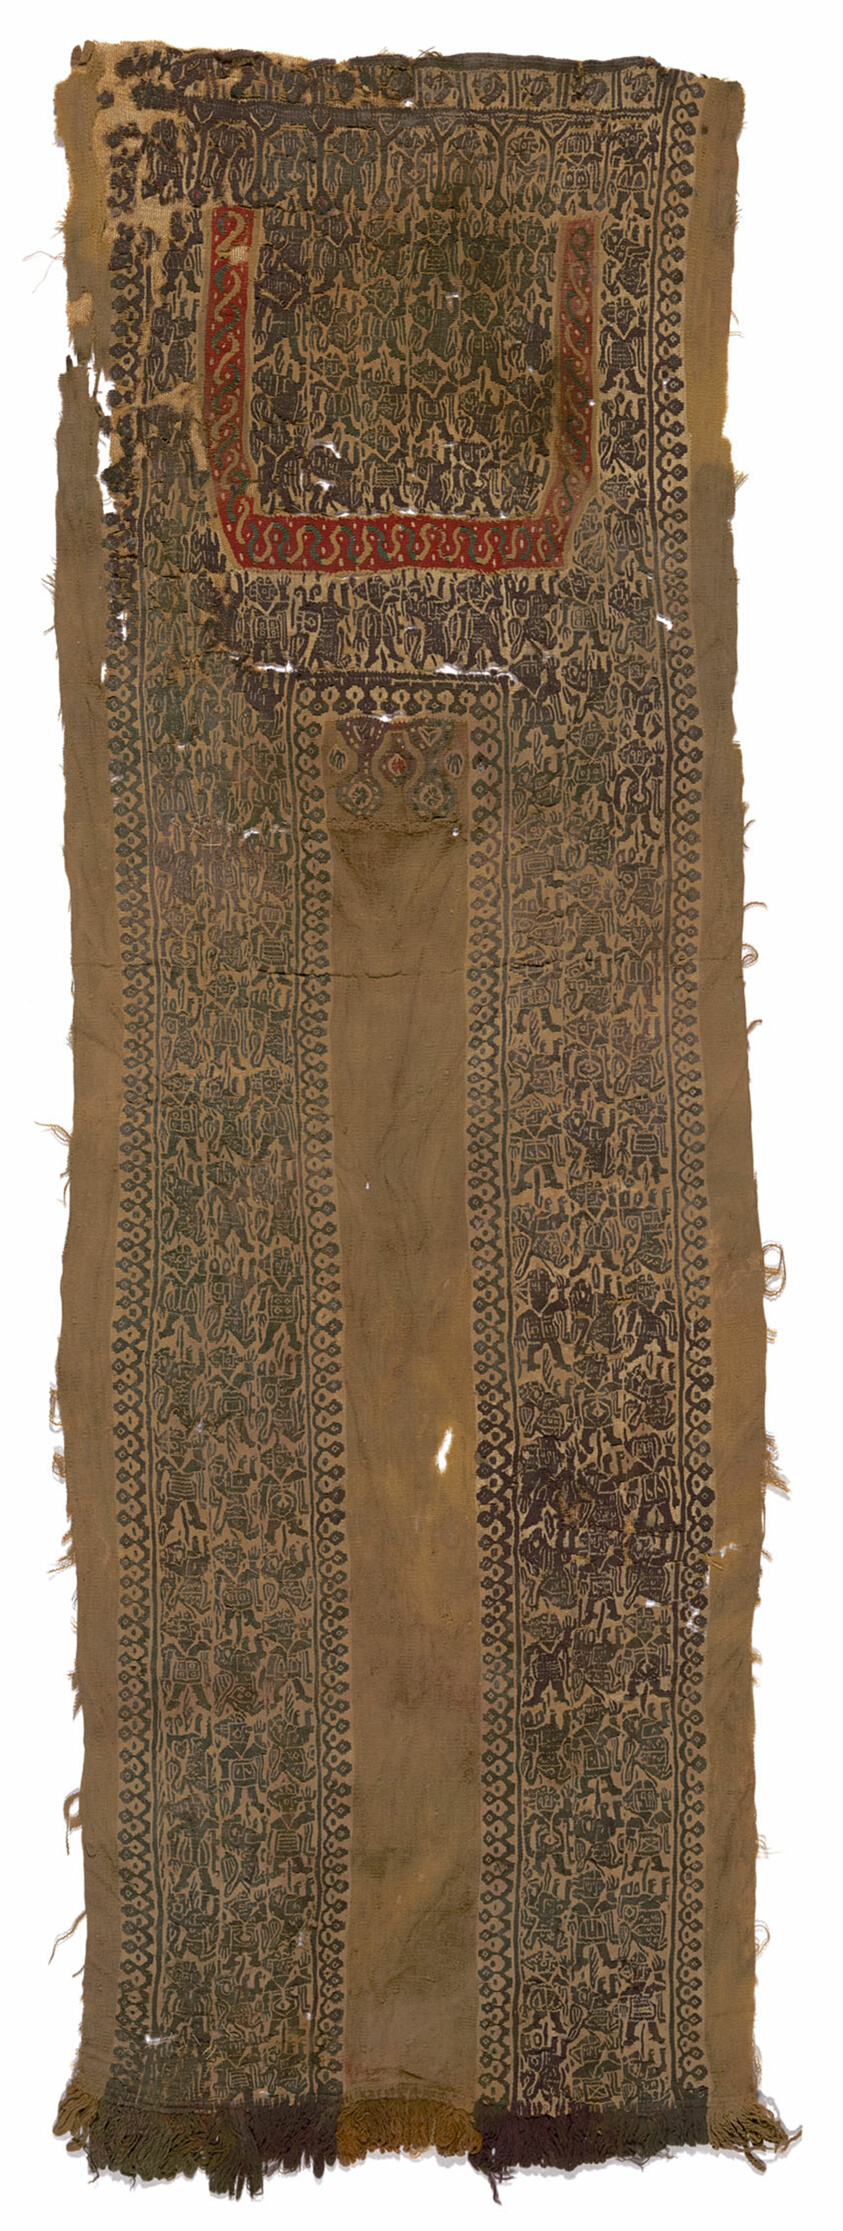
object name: Costume and Accessories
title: Tunic (Front Panel)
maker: Coptic (Egypt)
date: Arab period (641–969)/Fatimid period (969–1171), 9th/10th century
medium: Linen and wool, tapestry weave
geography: Egypt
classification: textile; weaving; costume; dress (garment); clothing